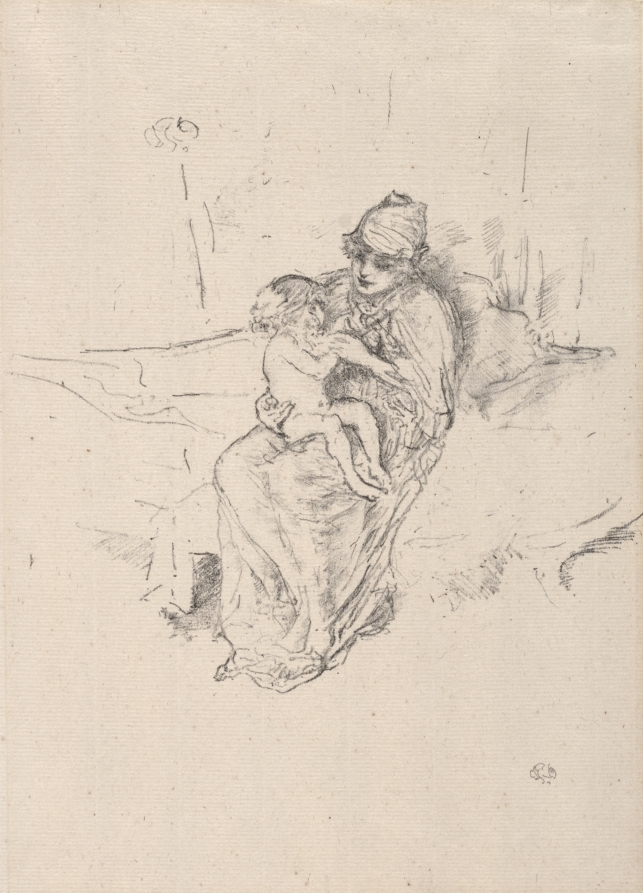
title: Mother and Child, No. 1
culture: America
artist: James McNeill Whistler (American, 1834–1903)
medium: lithograph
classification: Print